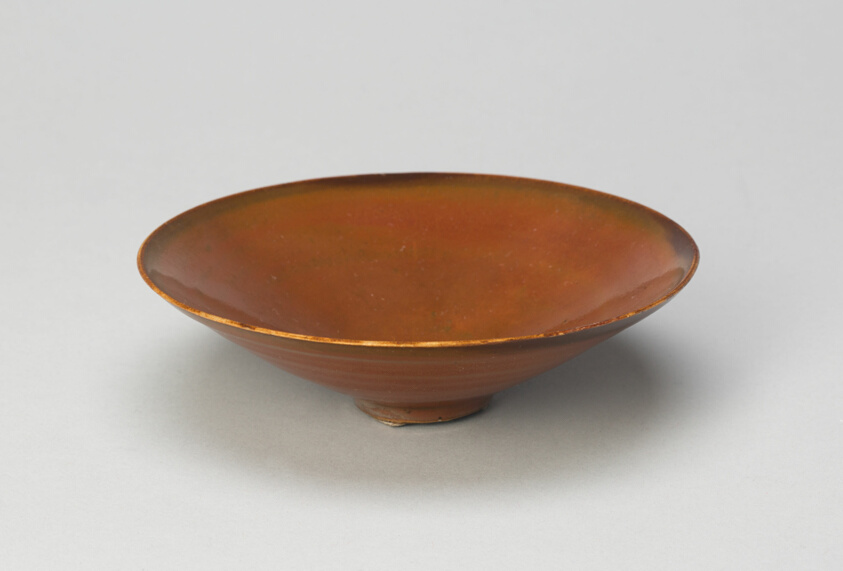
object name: Vessel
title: Conical Bowl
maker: China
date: Northern Song dynasty (960–1127), early 12th century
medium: Northern black ware, Cizhou type; stoneware with reddish-brown glaze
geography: China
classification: bowl; porcelain; dish (vessel); asian art; ceramics; vessel